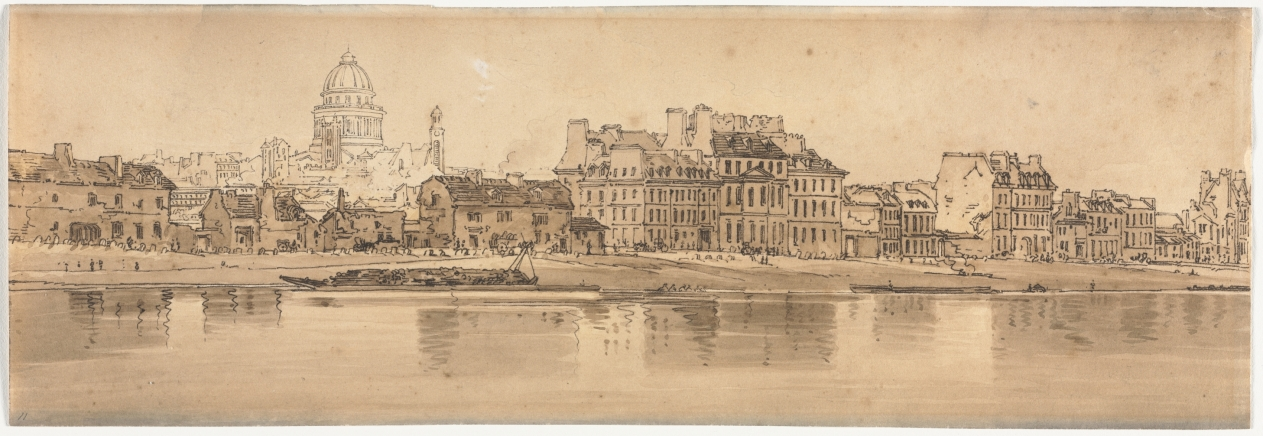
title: A Selection of Twenty of the Most Picturesque Views in Paris: View of the Pantheon taken from the Arsenal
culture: England, early 19th Century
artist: Thomas Girtin (British, 1775–1802)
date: 1802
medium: soft-ground etching with bistre wash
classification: Print